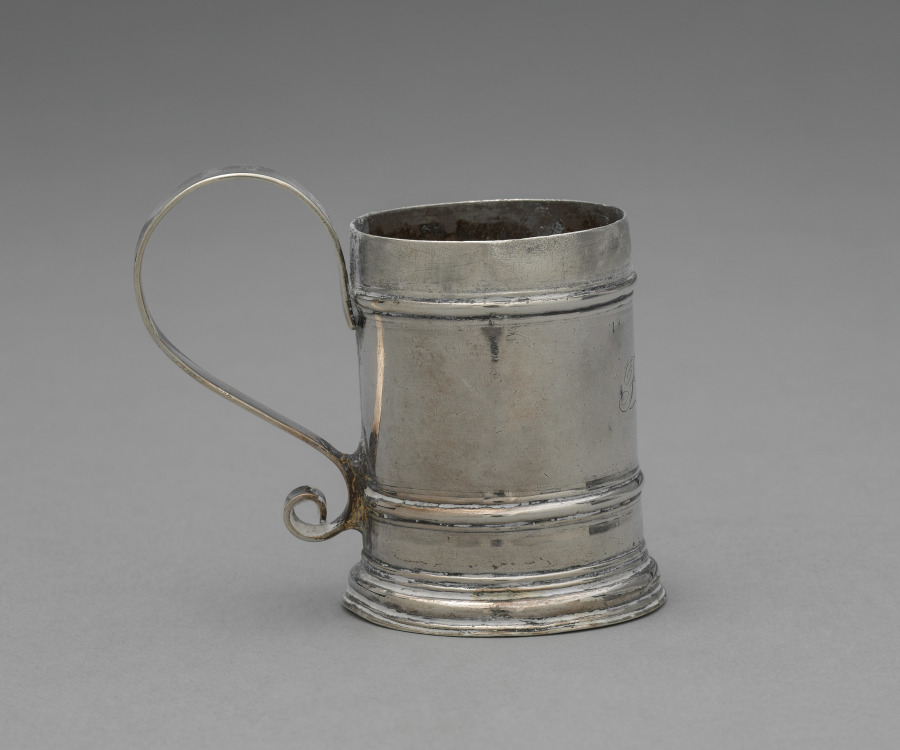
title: Caster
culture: America, Massachusetts, Boston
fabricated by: John Edwards (British)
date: c. 1715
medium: silver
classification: Silver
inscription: engraved "C" over "EE" in shaded block letters on bottom, and "FLB" (later) in bright-cut script on front, opposite handle.